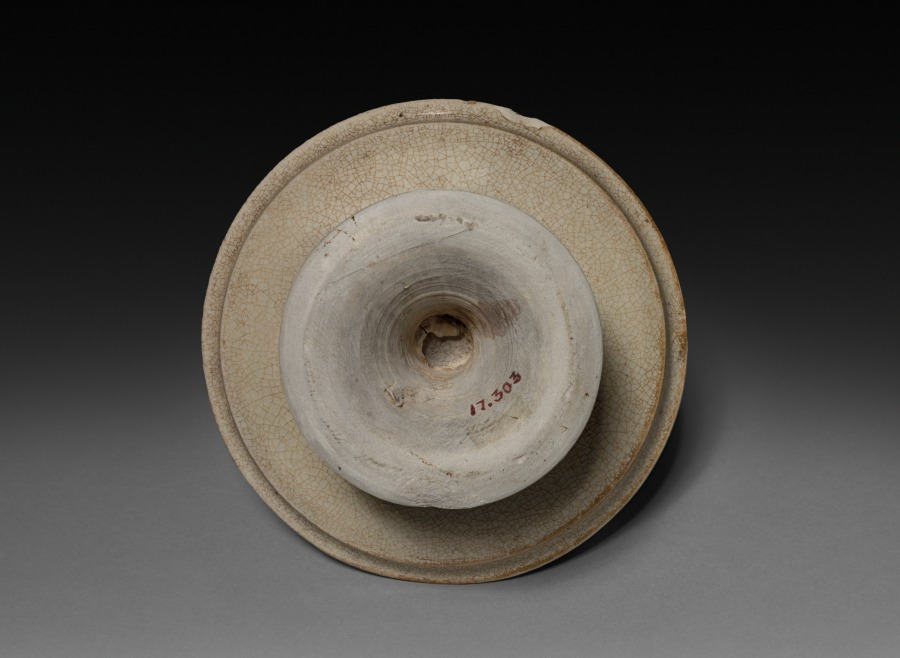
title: Stem Dish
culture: China, Tang dynasty (618-907)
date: 600s-700s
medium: glazed cream-white stoneware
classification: Ceramic